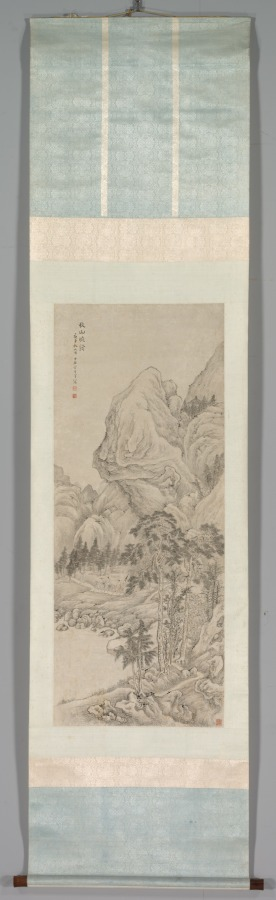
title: Landscape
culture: China, Qing dynasty (1644-1911)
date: 1644–1911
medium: hanging scroll, ink and slight color on paper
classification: Painting